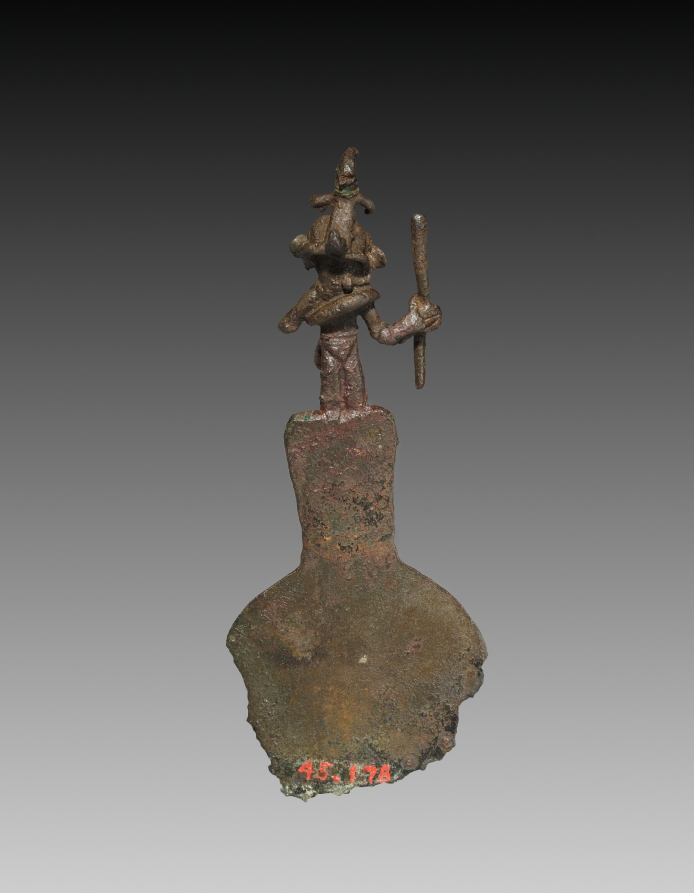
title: Knife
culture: Peru, Inca Culture, 15th-16th century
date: 1400s-1500s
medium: bronze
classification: Metalwork